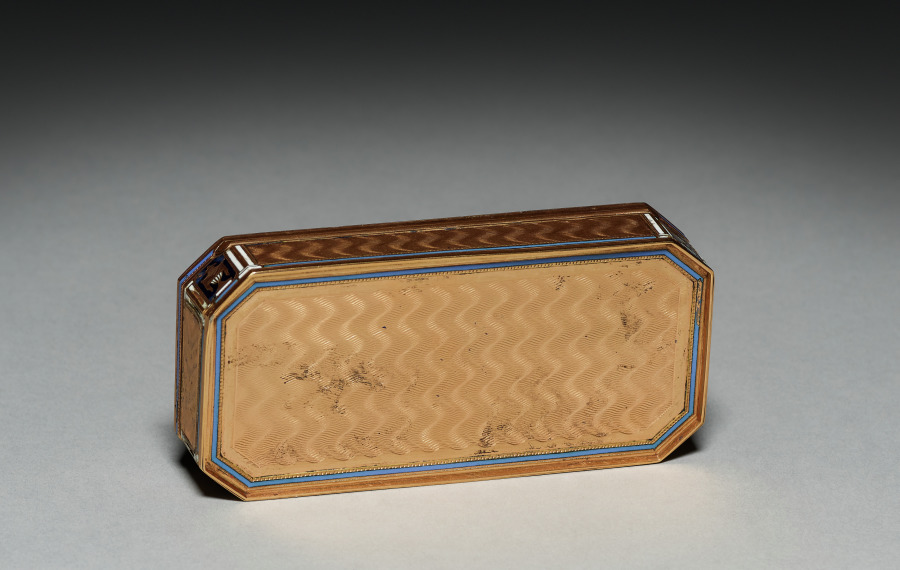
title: Box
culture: Switzerland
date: early 1800s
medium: gold and enamel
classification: Miscellaneous